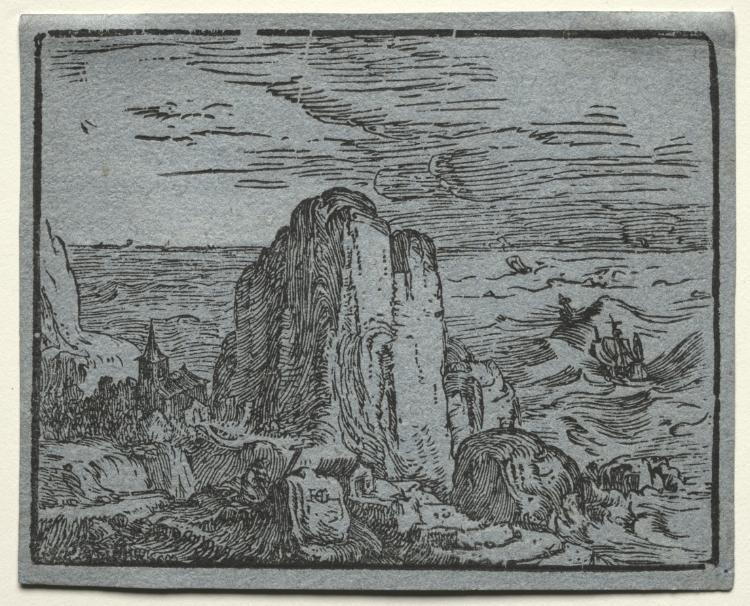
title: Four Small Landscapes: No.4, Cliff on the Seashore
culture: Netherlands, 16th century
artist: Hendrick Goltzius (Dutch, 1558–1617)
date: c. 1600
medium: woodcut on blue paper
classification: Print